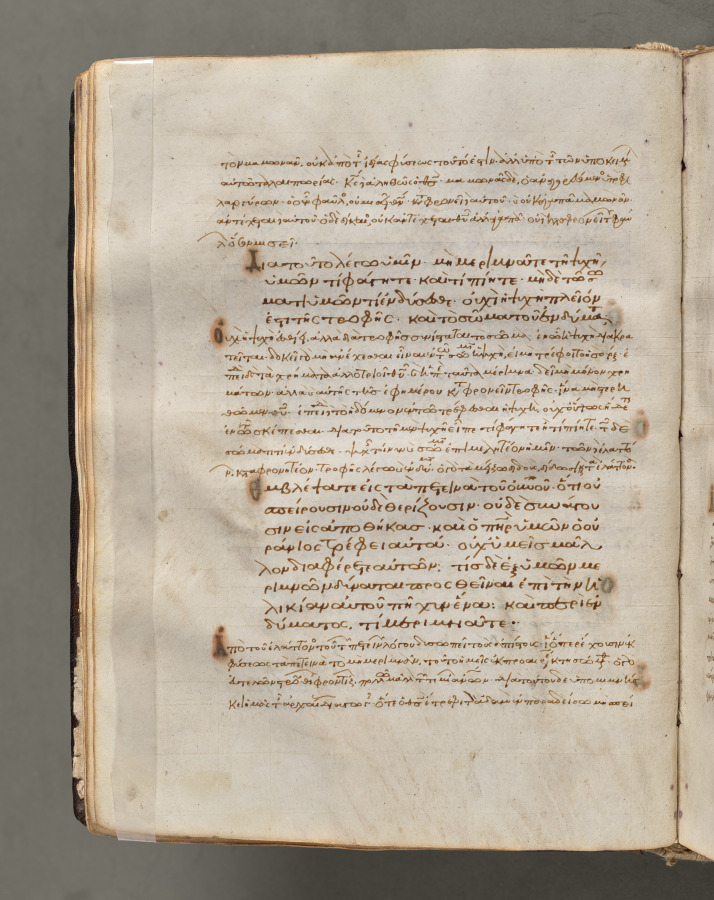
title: Text, folio 27 (verso), from a Gospel Book with Commentaries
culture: Byzantium, Constantinople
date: c. 1000–1100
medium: ink, tempera, and gold on vellum; leather binding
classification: Bound Volume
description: Each of the four gospels in this book opens on a page with brilliantly illuminated borders depicting the author of the text as well as birds—principally peacocks, symbols of the immortality of the soul—and fountains, representing the fountain of life and the salvation of the soul. This volume consists of 428 leaves with texts in Greek. Its level of sophistication suggests that it was probably written and decorated in a monastery in Constantinople.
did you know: Gospel books were carried in procession through Byzantine churches.